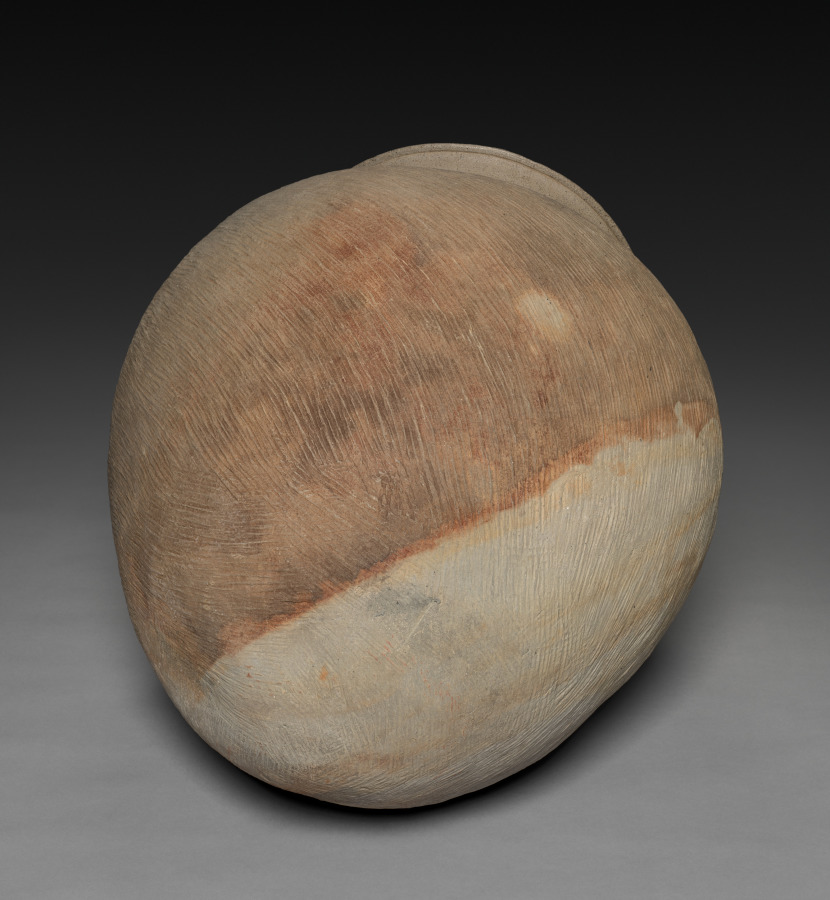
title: Wide-Mouth Jar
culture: Japan, Kamakura period (1185–1333) to Muromachi period (1392–1573)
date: 1300s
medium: Stoneware with impressed and incised decoration (Suzu ware)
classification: Ceramic